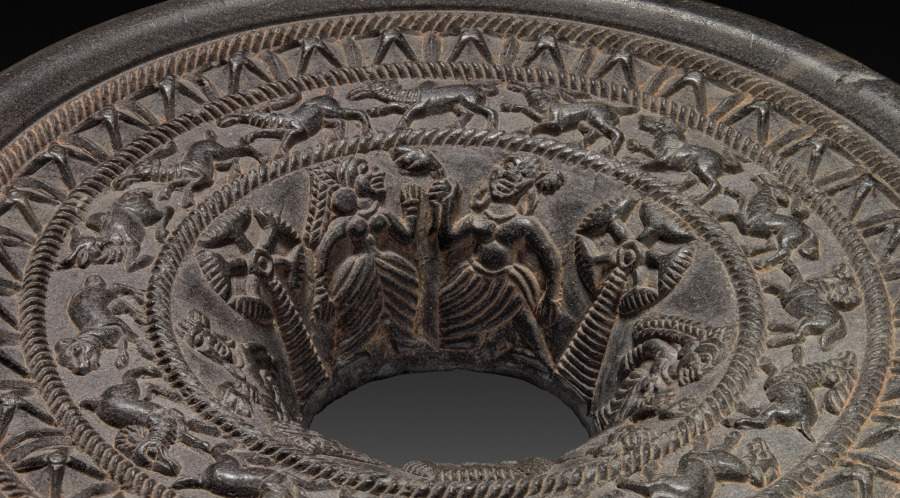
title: Ringstone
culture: India, Maurya period (322–185 BCE)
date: 200s BCE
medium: steatite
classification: Sculpture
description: Ringstones are among the earliest works of art to be created in stone during India's historical period. This example is finely carved with detailed images of affectionate couples and palm trees, running animals, and geometric motifs in concentric circles. The function of ringstones remains uncertain, since none of the surviving examples is inscribed or explained in a text.